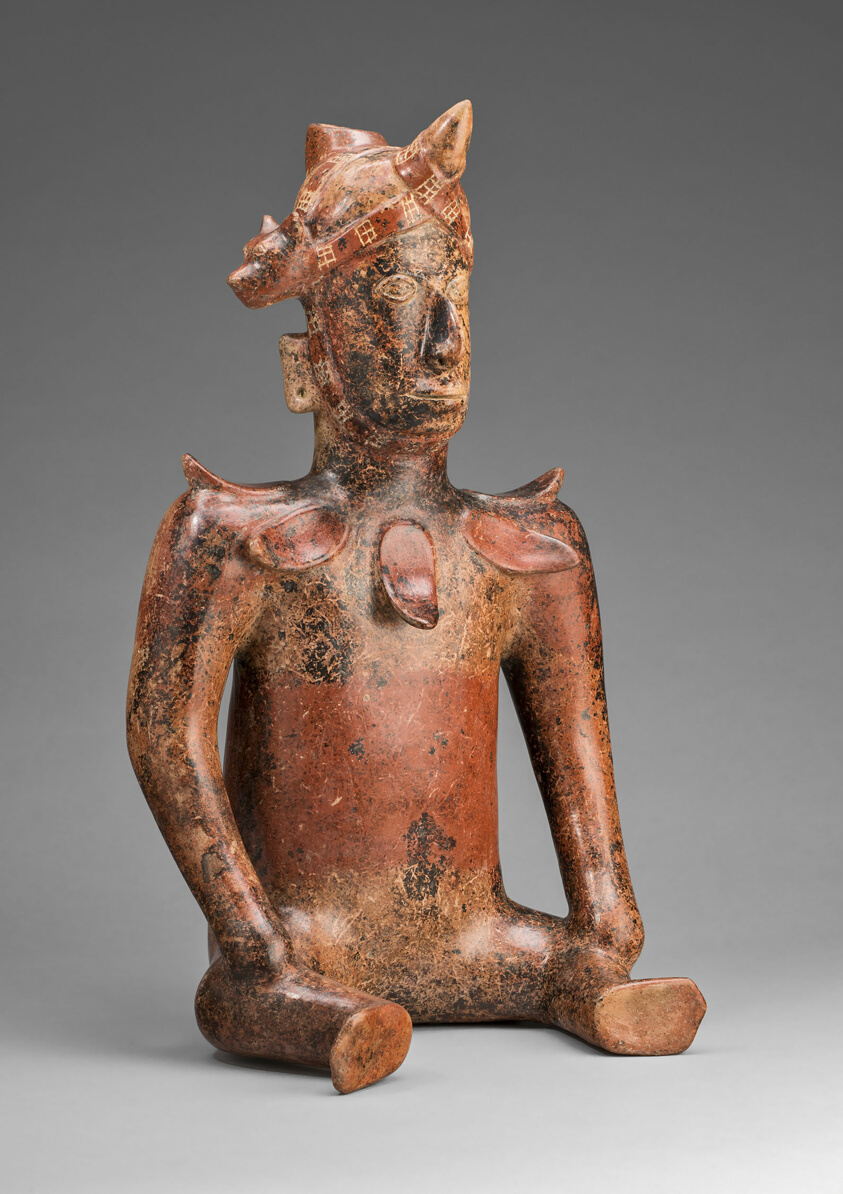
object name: Sculpture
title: Figure of a Seated Chieftain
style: colima, mesoamerican, Pre-Columbian, americas, west mexico, Arts of the Americas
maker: Colima (Colima, Mexico)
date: 100 BCE–250 CE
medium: Ceramic and pigment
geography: Colima state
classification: earthenware; art of the americas; ceramics; sculpture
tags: people, headdresses, rulers (people), rulership